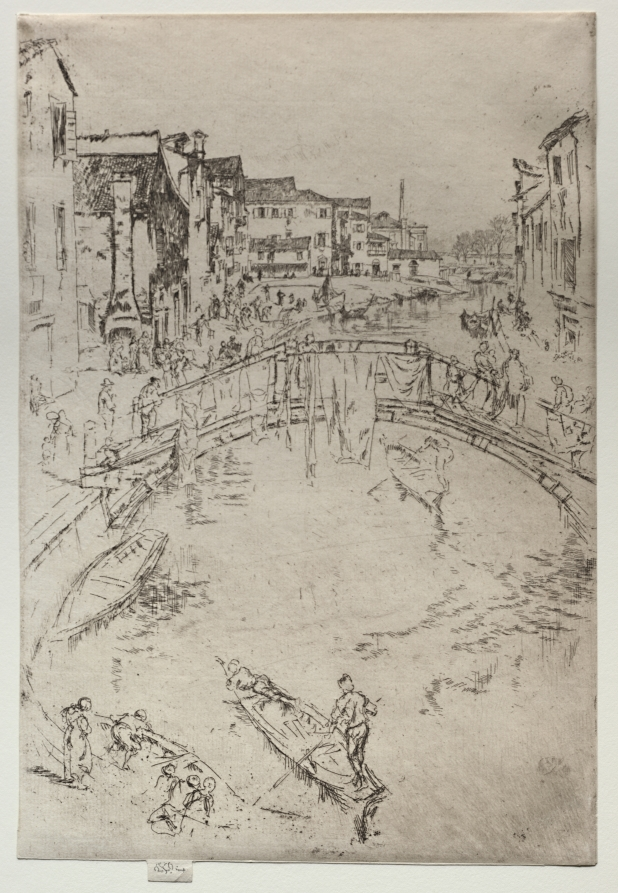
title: The Bridge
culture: America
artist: James McNeill Whistler (American, 1834–1903)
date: 1879–80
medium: etching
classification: Print